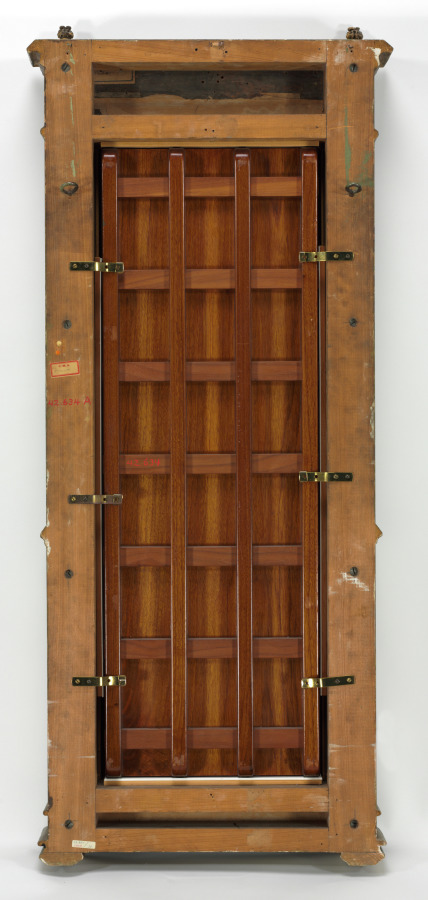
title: Saint Barbara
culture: Flanders, Bruges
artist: Master of the Holy Blood (Netherlandish)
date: c. 1520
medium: tempera on wood panel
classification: Painting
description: Saint Barbara holds both a book and a ring symbolizing her scholarly pursuits and union with God. According to legend, the leather thongs with which she was beaten were transformed into peacock plumes. This painting and one other in the collection (1942.633.1) were originally the wings of an altarpiece flanking a central panel, now lost, that may have depicted the Holy Family. The identity of this artist is unknown, but he is named for a painting in the Chapel of the Holy Blood in Bruges. Bruges flourished as an international commercial center through the 1400s and early 1500s. Among its residents were many foreign merchants and bankers who, along with the Burgundian court, patronized artists and attracted specialized craftsmen such as furriers, hatters, jewelers, and goldsmiths. Bruges’s artistic production in the 1400s included celebrated artists like Jan van Eyck, Petrus Christus, Hans Memling, and Gerard David who painted large altarpieces, small panels for private devotion, and portraits. Bruges also remained an important center for the production of illuminated manuscripts.